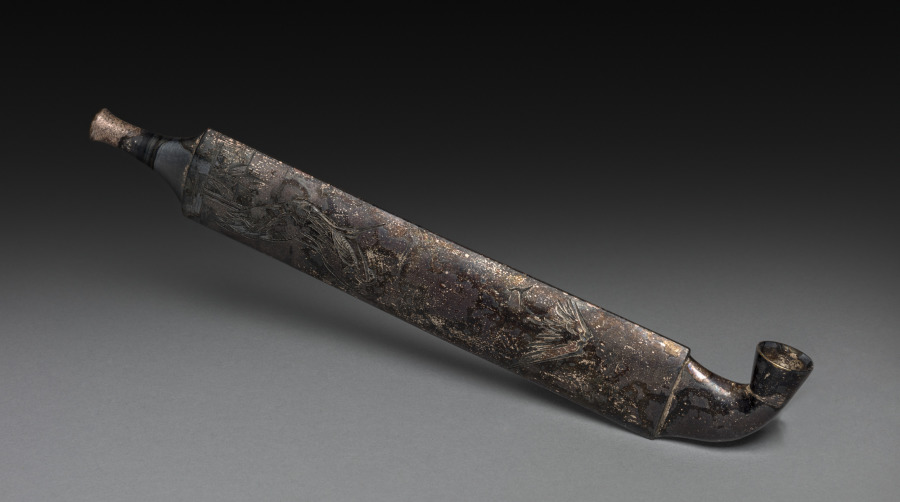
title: Tobacco Pipe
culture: Japan, Edo period (1615–1868)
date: early to mid-1800s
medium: silver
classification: Miscellaneous